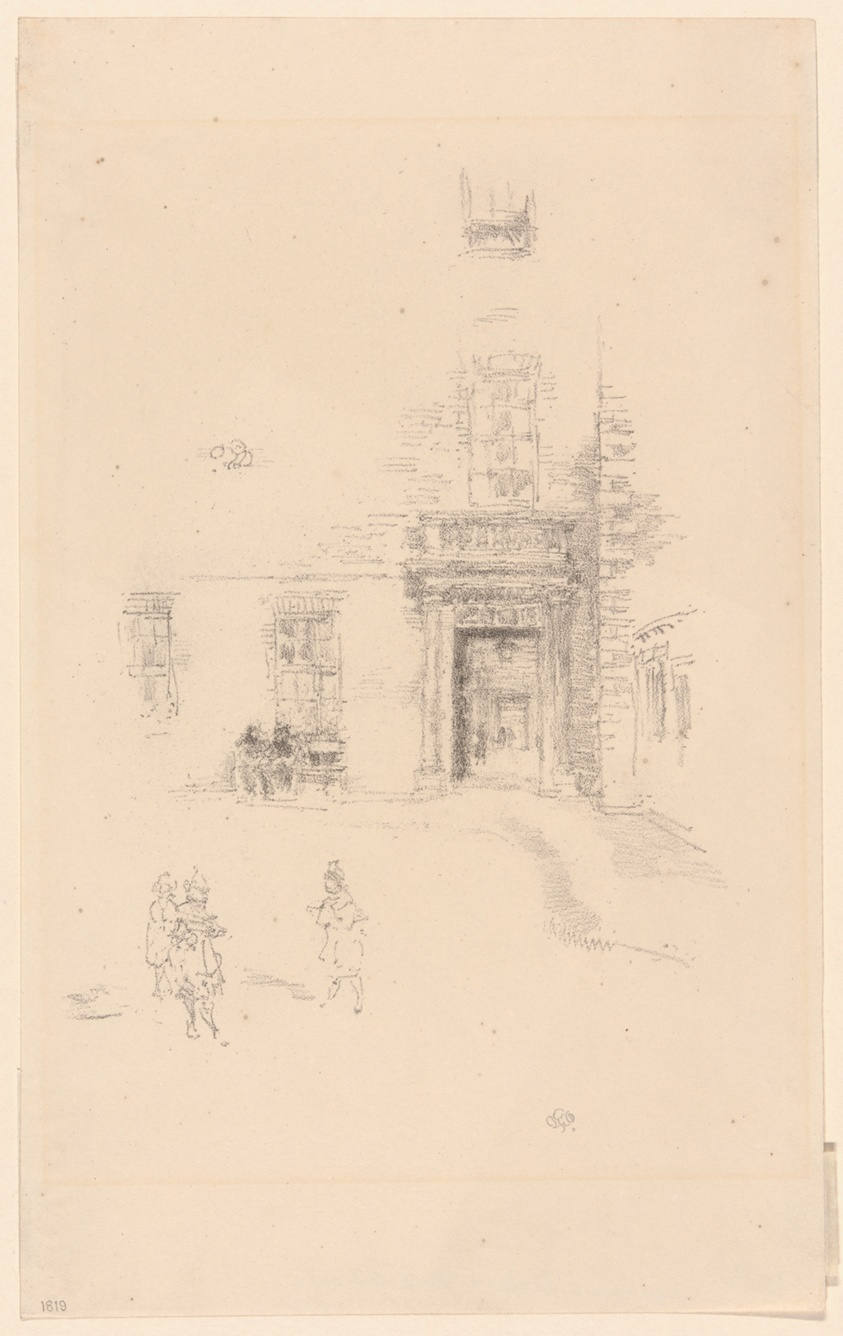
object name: Print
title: Courtyard, Chelsea Hospital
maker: James McNeill Whistler (American, 1834-1903)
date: 1888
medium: Lithograph, in black ink, with stumping, on cream wove paper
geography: United States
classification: lithograph; print; prints and drawing; paper